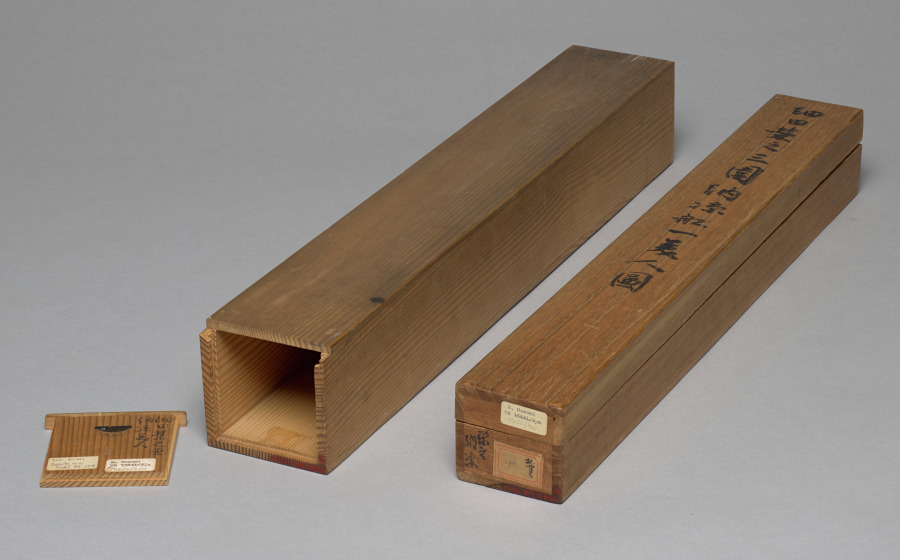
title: Beauty in a Boat on Sumida River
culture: Japan, Edo period (1615–1868)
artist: Chōbunsai Eishi (Japanese, 1756–1829)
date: c. 1801–4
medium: hanging scroll; ink and color on silk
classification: Painting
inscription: artist's signature 栄之筆 and seal, lower right.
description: The Sumida River was a popular refuge from the heat and humidity of the city during the summer. One can see the torii gate of Mimeguri Shrine just to the left of the woman's fan.